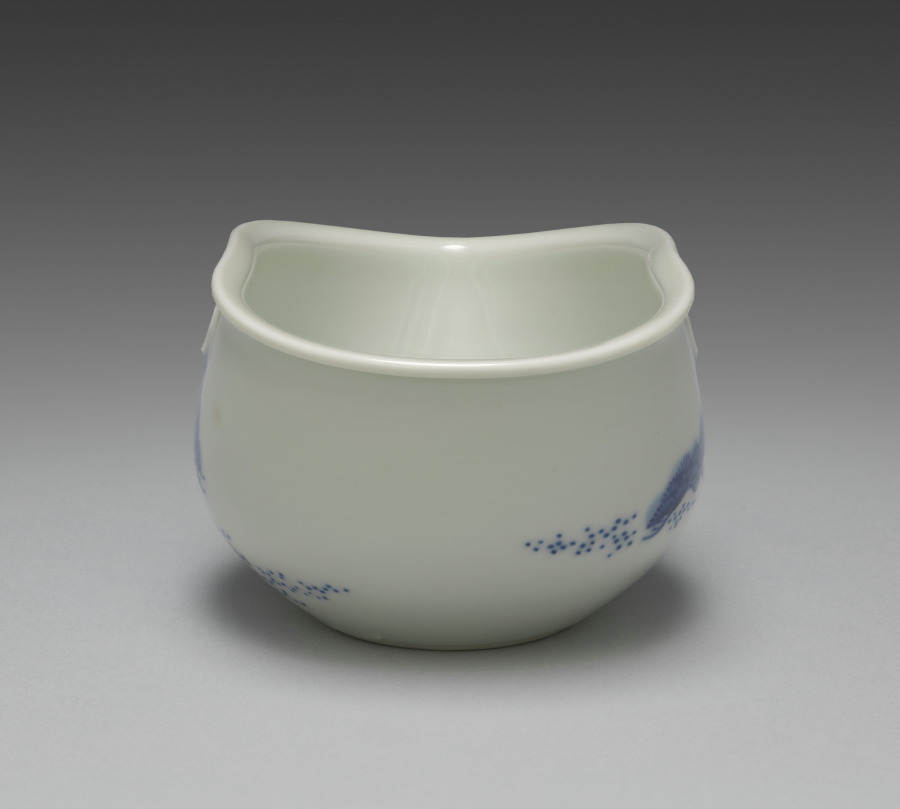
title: Water Cooler with Pines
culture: Japan, Meiji period (1868–1912)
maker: Seifū Yohei III (Japanese, 1851–1914)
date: 1893–1914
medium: Porcelain with underglaze blue and molded designs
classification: Ceramic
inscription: The center of the base contains an ovoid “Seifu” seal.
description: Hot water coolers, or yuzamashi, are essential components of sencha tea sets. Yuzamashi are used to cool boiled water to the ideal temperature for the type of tea to be brewed. The kidney-like shape of this one permits it to be cradled in one hand, following curvature of the palm, with the tips of the thumb and index finger each pressed against a nyoi staff-head-shaped applied form, perfectly placed to ensure a stable hold. Someone pinching the cooler in this way would have enough protection from the heat to maintain a steady grip but also sufficient contact along the base of thumb to assess the water temperature. On each of the cooler’s two longer sides, a pine tree in grass or sand is painted under the glaze in cobalt blue. The tree on one side has two main roots and two large branches, while that on the other has a single, thick, curved line from root to tip with racks of needles spreading across the width of the sky. A blue oval is traced along the footring, and the center of the base contains an ovoid “Seifu” seal.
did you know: Evergreen, pines have associations with eternal youth and longevity.